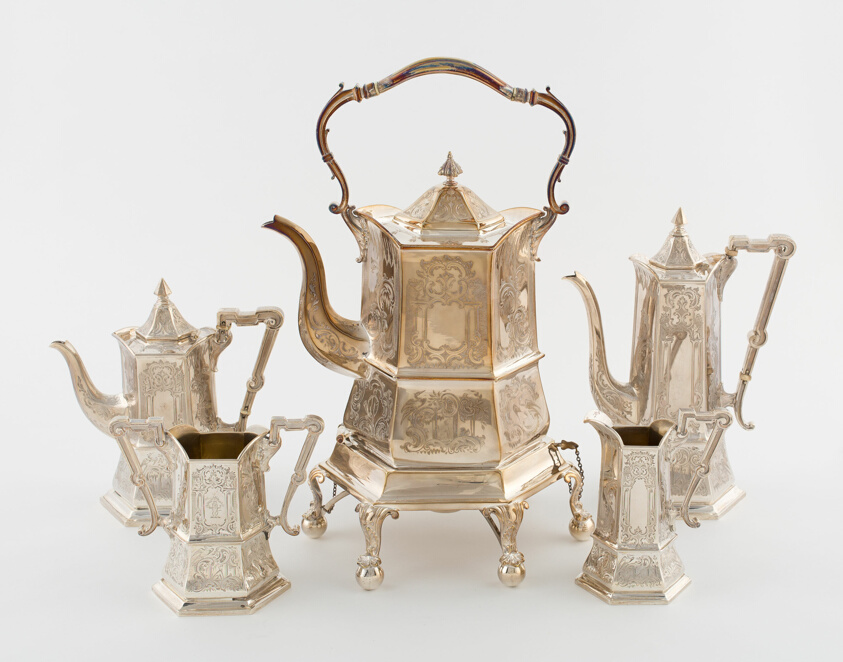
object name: Metalwork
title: Tea and Coffee Service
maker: George Angell; English, active 1865; London, England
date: 1865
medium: Sterling silver and ivory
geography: London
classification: tea service; silver; metalwork; european decorative arts